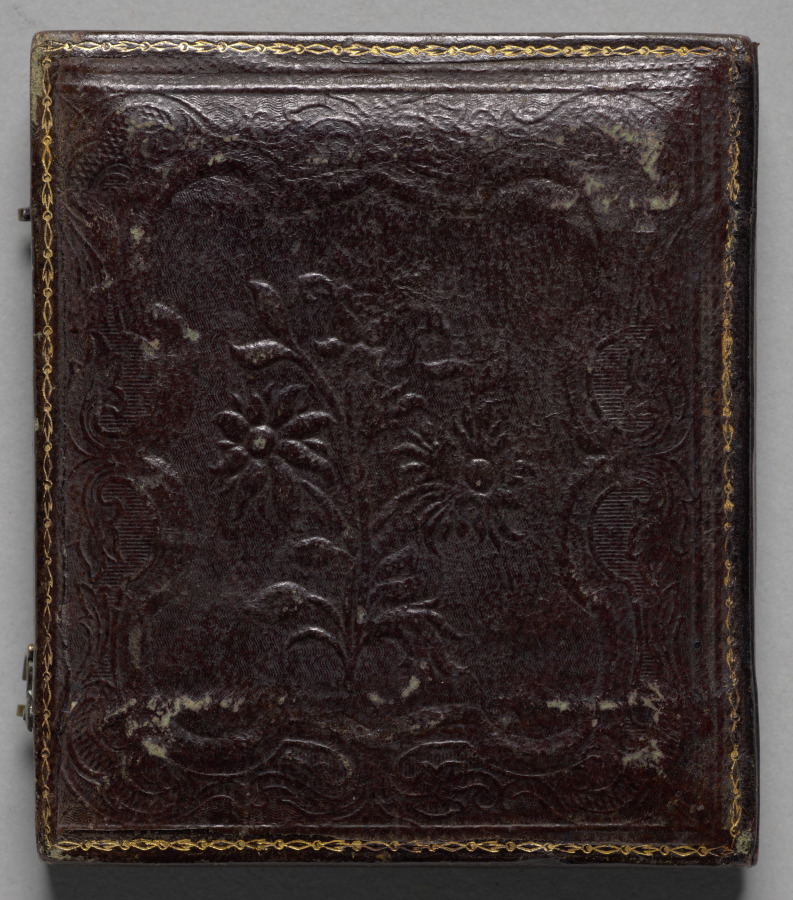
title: Magician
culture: America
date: c. 1850–55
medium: daguerreotype, sixth plate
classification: Photograph